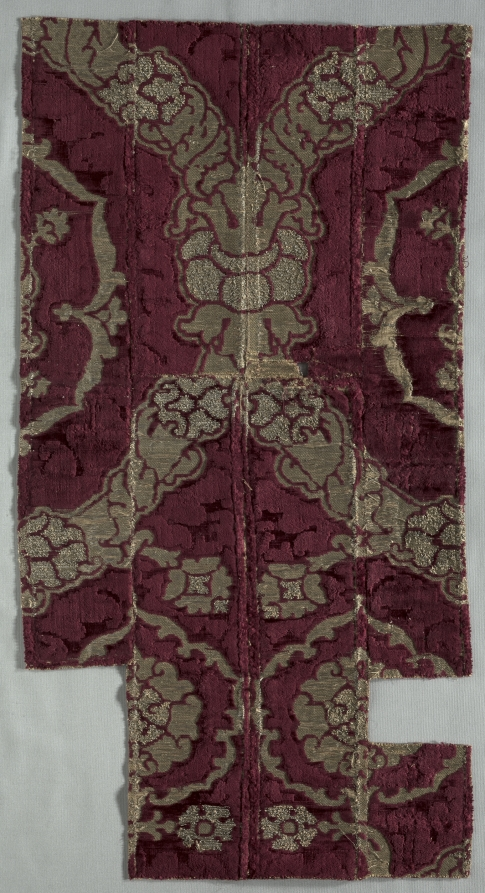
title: Velvet Fragment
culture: Italy, 15th century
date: 1400s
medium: velvet (cut and brocaded); silk and metal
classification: Velvet